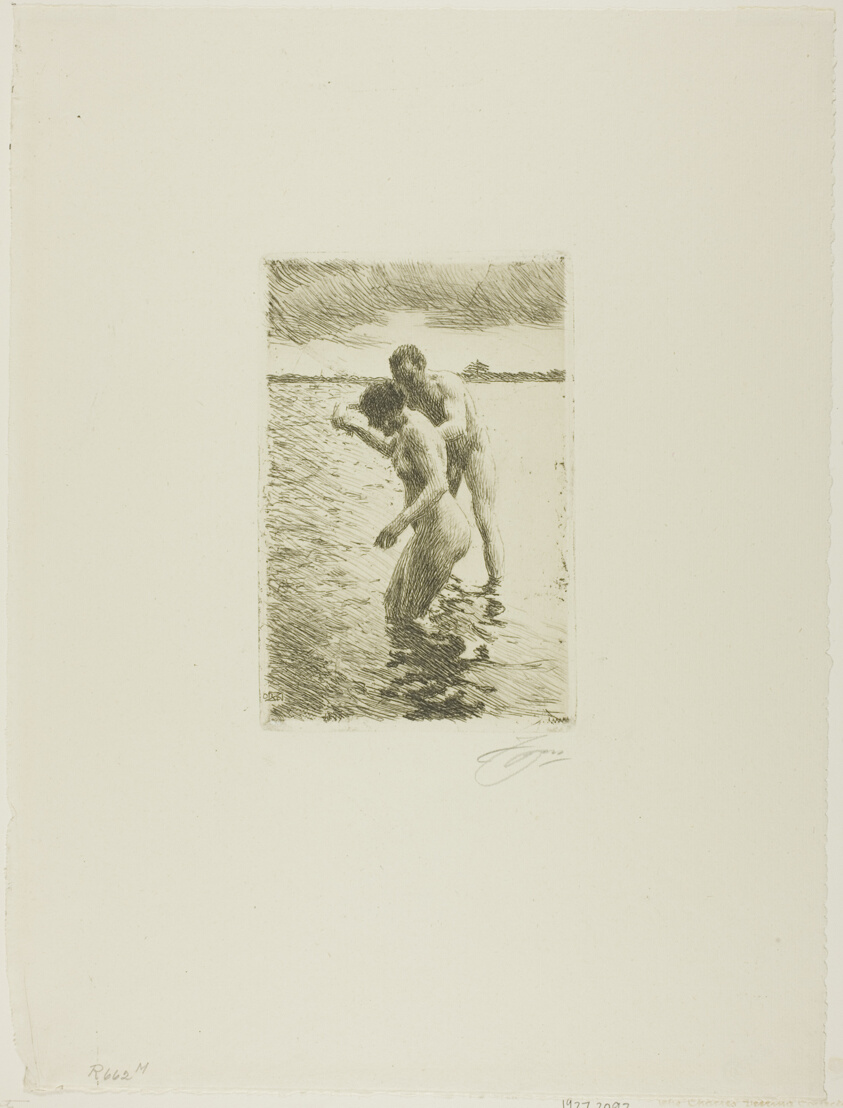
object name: Print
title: Pilot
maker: Anders Zorn (Swedish, 1860-1920)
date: 1919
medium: Etching on ivory laid paper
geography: Sweden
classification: etching; print; prints and drawing